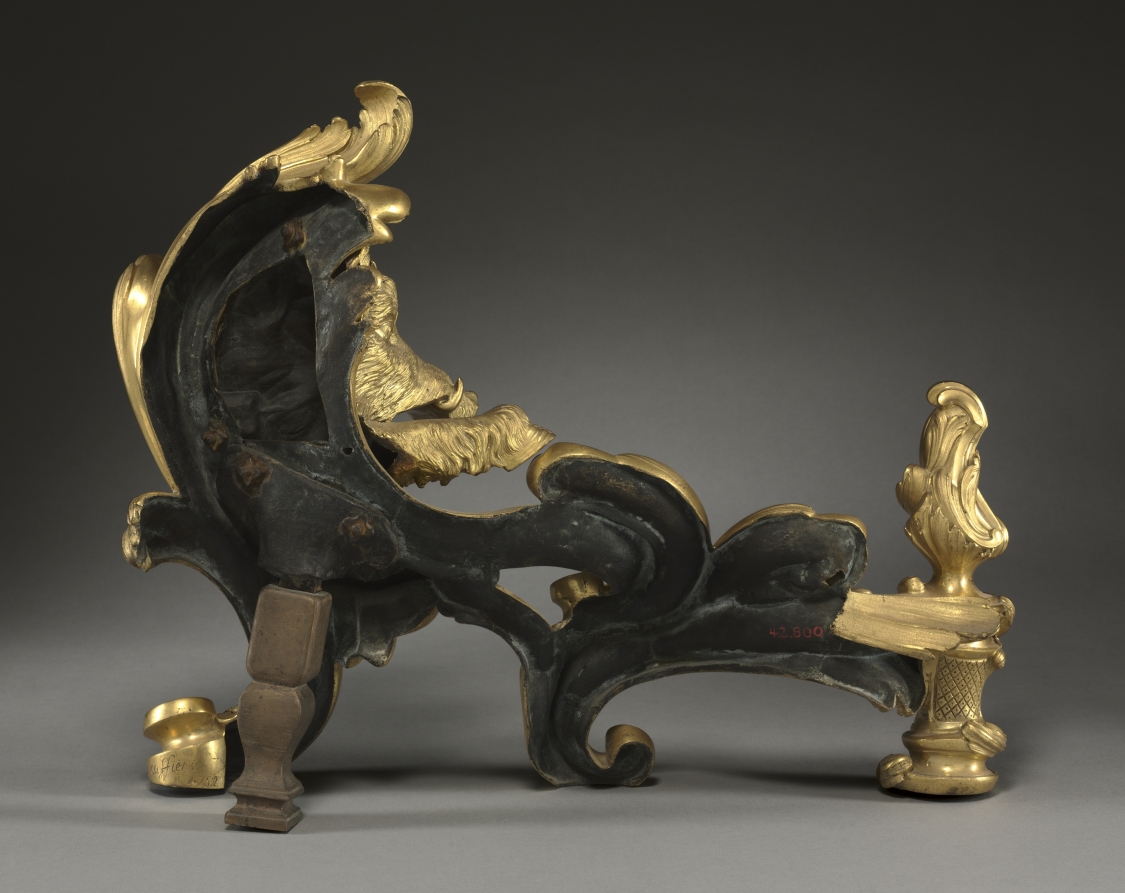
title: Firedog (2 of 2)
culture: France, 18th century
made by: Jacques Caffieri (French, 1678–1755)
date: 1752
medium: gilt bronze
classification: Furniture and woodwork